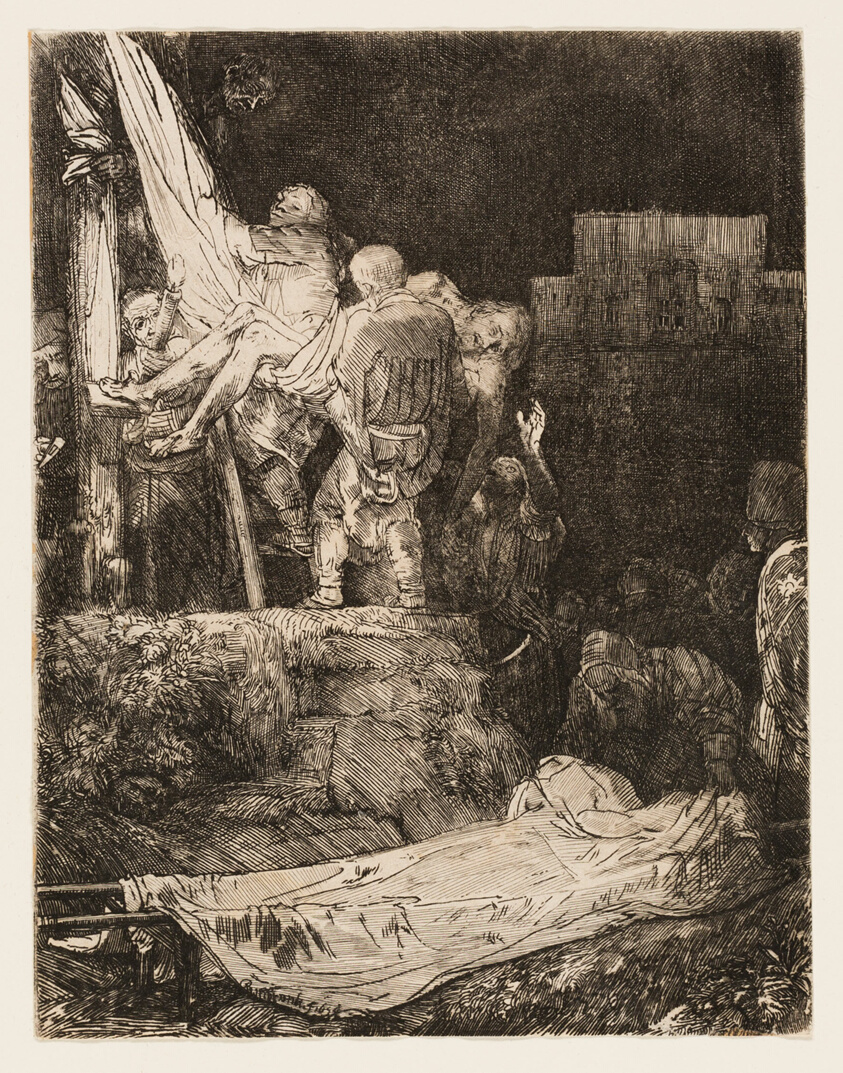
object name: Print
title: The Descent from the Cross by Torchlight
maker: Rembrandt van Rijn (Dutch, 1606-1669)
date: 1654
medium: Etching and drypoint on off-white laid paper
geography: Holland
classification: etching; print; prints and drawing; paper; drypoint